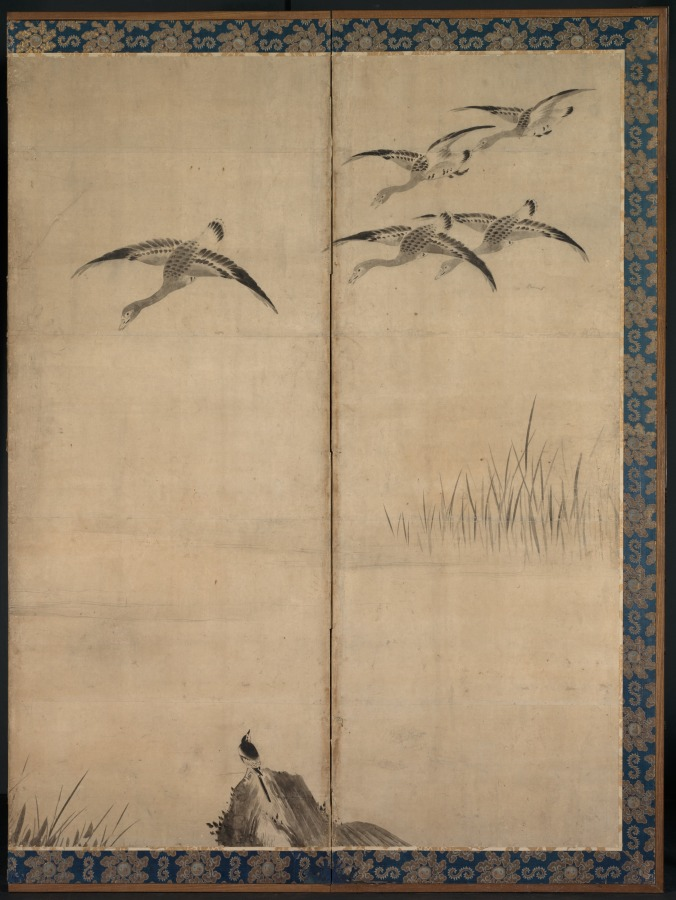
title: Wild Geese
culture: Japan, Edo period (1615–1868)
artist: Kano Sanraku (Japanese, 1559–1635)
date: late 1500s-early 1600s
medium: pair of six-fold screens; ink on paper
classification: Painting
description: Depictions of geese usually appear as ink paintings in Japan during the 1200s. They later show up in the colorful landscapes of illustrated handscrolls. Such early ink renditions of the birds have long been associated with classical Chinese Zen painting and poetry, which was avidly admired and collected in medieval Japan. In the screens on display, the artist portrayed the waterfowl in a pastoral setting without reference to classical or religious themes. Such ordinary subjects were imbued with special meaning in 14th- and 15th-century Japan through associations with continental culture, Zen thought and poetry, and famous Chinese monk-painters whose painting techniques had become revered as visual emblems of Zen principles. The screens here reflect the continuation of that painting tradition in the late 1500s or early 1600s by the head of the most important studio in Kyoto. Sanraku also executed a number of colorful folding screen compositions, but here pays homage to the style of early Zen painting.